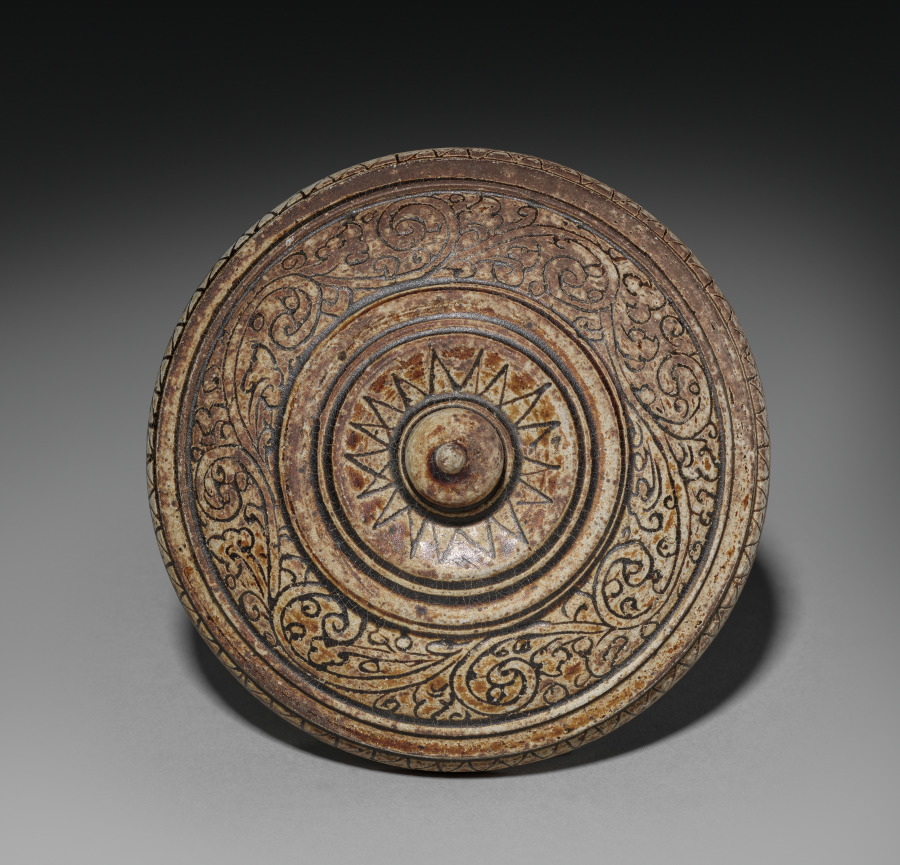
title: Covered Jar, Sawankhalok ware (lid)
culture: Thailand, Sukhothai Period, 14th century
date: 1300s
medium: pottery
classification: Ceramic